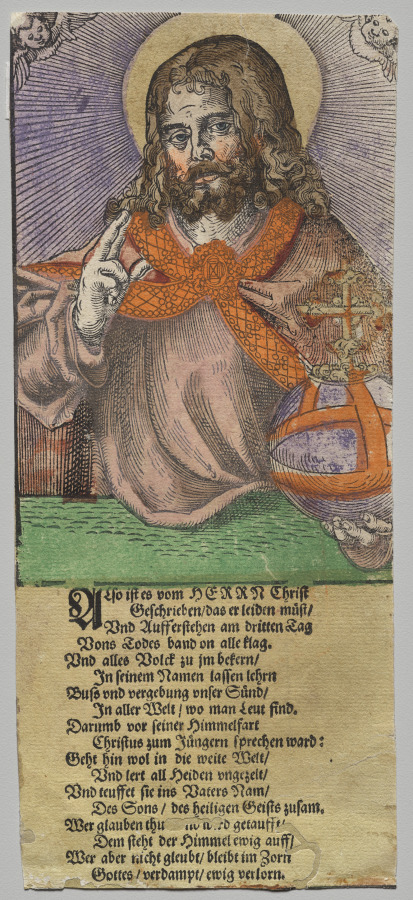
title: Christ from Christ, the Apostles, and Saint Paul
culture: Germany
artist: Lucas Cranach the Elder, After (German, 1472–1553)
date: 1563/64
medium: Woodcut with letterpress text, hand colored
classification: Print